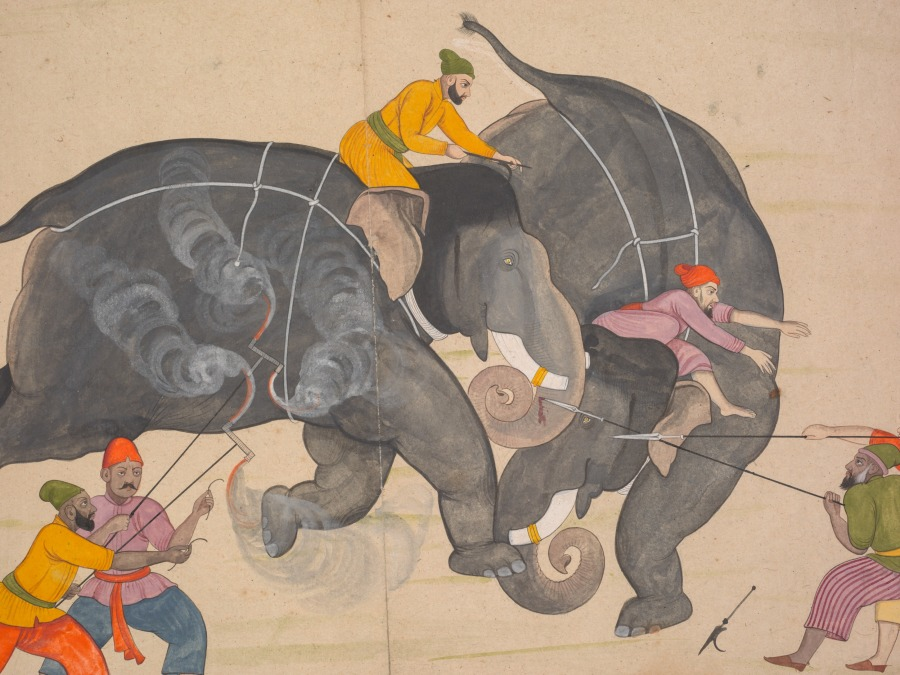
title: Two Elephants Fighting in a Courtyard Before Muhammad Shah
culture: Northern India, Himachal Pradesh, Guler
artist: attributed to Nainsukh (Indian, 1710–1778)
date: c. 1730–40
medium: Gum tempera, ink, and gold on paper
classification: Painting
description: The Mughal emperor responsible for a revival of courtly arts and pastimes was Muhammad Shah (reigned 1719–48). This painting was made by an artist from a small kingdom in the western Himalayas who stayed at the Mughal court in Delhi and painted scenes of his experiences. Like his predecessors, Muhammad Shah enjoyed watching elephant fights. He is shown in his window of public audience, marked by a golden carpet, smoking a hookah. Women from his harem can be seen looking on from behind painted screens. Two pairs of men hold fire brands and spears to prevent the elephants from running off and to keep them under control. The intensity of the fight—captured at a moment when one mahout, or elephant trainer, has dropped his goad and is about to jump off—is augmented by the dense colors and forms in contrast to the otherwise pale planes, balanced only by the strip of palace windows.